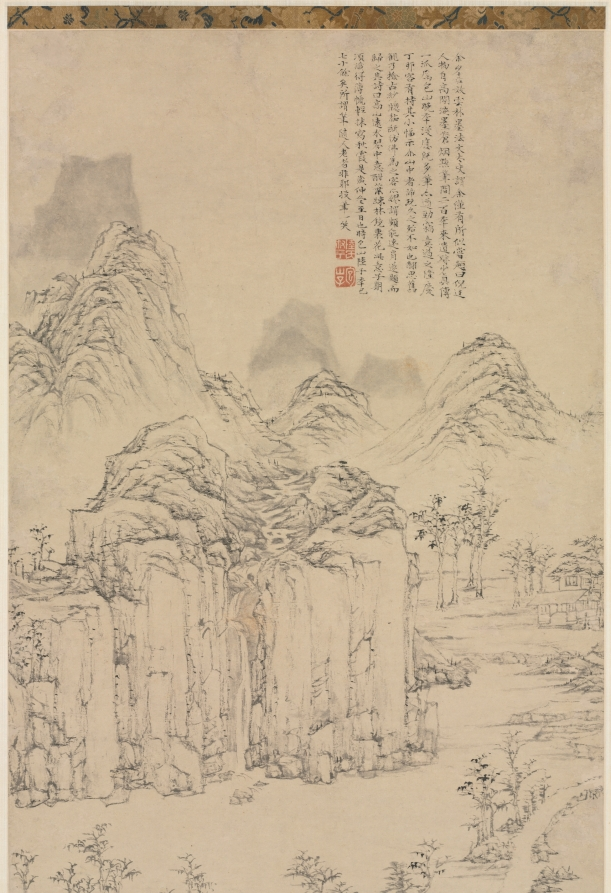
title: Daoist Retreat in Mountain and Stream (Landscape after Ni Zan [1301–1374])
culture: China, Ming dynasty (1368–1644)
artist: Lu Zhi (Chinese, 1496–1576)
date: 1567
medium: hanging scroll; ink on paper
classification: Painting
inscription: Artist's inscription, signature, and 3 seals: In my youthful days I liked to imitate the ink method of Yün-lin [Ni Tsan]. Mr. Wen, the academician [Wen Cheng-ming], remarked that I barely succeeded in achieving some resemblance. He once honored me with the inscription "lofty and imperturbable indeed was the personality of Ni Yü [Ni, the Odd]. Pale ink and blue smoke were formed by his scribbling brush. His surviving works have become so rare in the last two hundred years; only Pao-shan [Lu Chih] carries on his true tradition." In my older years, having to comply with frequent requests for paintings, my brushwork has become stronger than before and I thought to myself that I may have surpassed the Old Master. In the ting-mou year of the Lung-ch'ing era [1567] a friend brought a small painting [by Ni Tsan] and showed it to me in the mountains. I studied and enjoyed it for a long time, then realized that I was actually inferior. This gave me second thoughts about my earlier style, so I selected a piece of old window paper and did this painting in imitation. My friend was kind enough to say that it was truly a quick and close resemblance. I then wrote a colophon and presented the painting to him. My poem says: High mountains and distant waters are the thoughts coming from the lute; The drunken leaves and the sparse woods are merely flowers in the mirror. This idea, I'm sure, will be understood by Tzu-ch'i, one who appreciates my art, It is for him that I have painted on thin paper with light touches, The cloudy color of an autumn evening. This is the winter solstice of the same year. By then, Pao-shan, Mr. Lu, was already over seventy years of age. Could it be that one's brush also gets old together with one's age, as the saying goes. I put down my brush with a laugh. [2 seals] Lu Shu-p'ing shih, Pao-shan tzu. [seal, bottom left corner] Lu Chih shu-p'ing. trans. WKH 6 additional seals of Chu Ching-hou (n.d.).